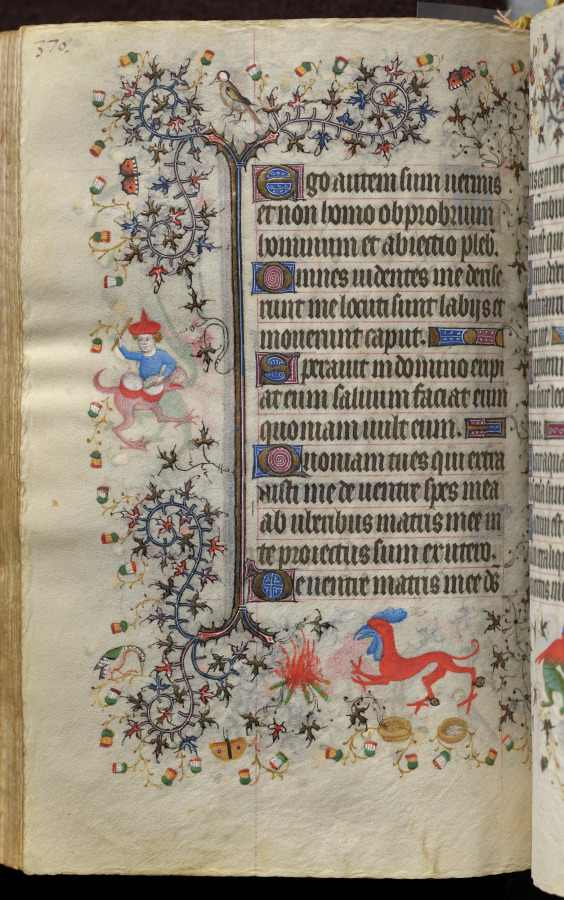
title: Hours of Charles the Noble, King of Navarre (1361-1425): fol. 180v, Text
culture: France, Paris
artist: Master of the Brussels Initials and Associates (French)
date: c. 1405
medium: ink, tempera, and gold on vellum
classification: Bound Volume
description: This precious volume was obviously highly prized by its owner, the French-born King of Navarre, who had his coat of arms painted on no less than twenty folios. Rather than directly commissioning this manuscript from a specific workshop, it seems that Charles the Noble acquired his book of hours -- perhaps ready-made for the luxury market -- while on a trip to Paris in 1404-05. A collaborative effort, six painting styles are evidenced within the pages of this codex, those of two Italians, two Frenchmen, and two Netherlanders. The painter who was responsible for the planning and decoration of the book, and who produced seventeen of the large miniatures, was a Bolognese artist known as the Master of the Brussels Initials. His principal assistant, responsible for most of the borders, was a Florentine who signed his name "Zecho" da Firenze on folio 208 verso.